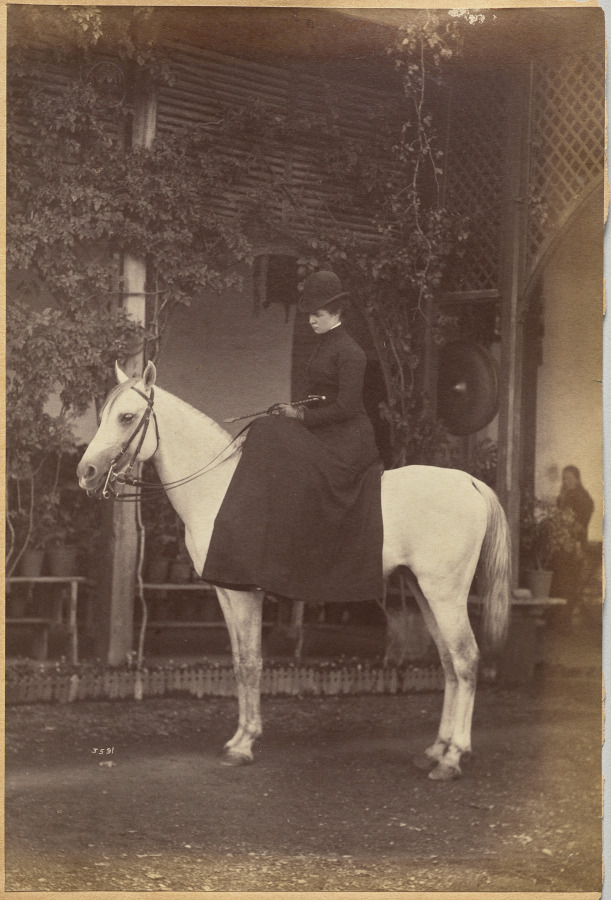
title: Untitled: Woman on horse (verso, right)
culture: India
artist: Raja Deen Dayal (Indian, 1844–1905)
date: c. 1882–87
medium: albumen print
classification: Photograph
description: These photographs are part of an album, now disassembled, of around 105 photographs taken in India between 1885 and summer 1887 that provide glimpses into the lives of the British colonial elite and royal and upper-class Indians. The museum holds another group of 37 pictures from this album (2016.266), which was probably commissioned by a British civil servant visiting or working in India around 1888 as a personal souvenir of his experiences there.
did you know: Raja Deen Dayal is regarded now, and was considered during his lifetime, to be India’s most important 19th-century photographer.